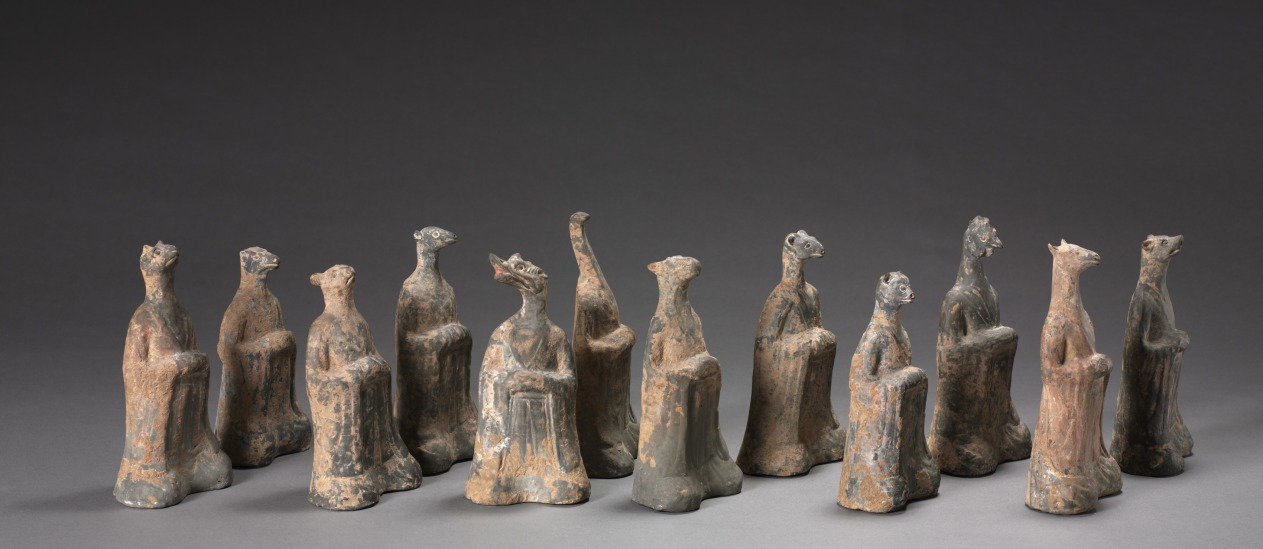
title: Mortuary Figures of the Zodiac Signs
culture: China, Northern Wei dynasty (386–534 CE)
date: 500s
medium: gray earthenware with traces of slip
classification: Sculpture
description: The twelve-animal zodiac series—rat, ox, tiger, rabbit, dragon, snake, horse, goat, monkey, rooster, dog, and boar—signifies a traditional Chinese concept of time structured in a cyclical order. The twelve animals are also linked to the art of fortune-telling that underlies human existence in connection with the changes of the universe. The use of the twelve zodiac animals as tomb furniture suggests they provided a cosmological structure for the afterlife.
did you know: These earthenware mortuary figures appear to have been made in molds.